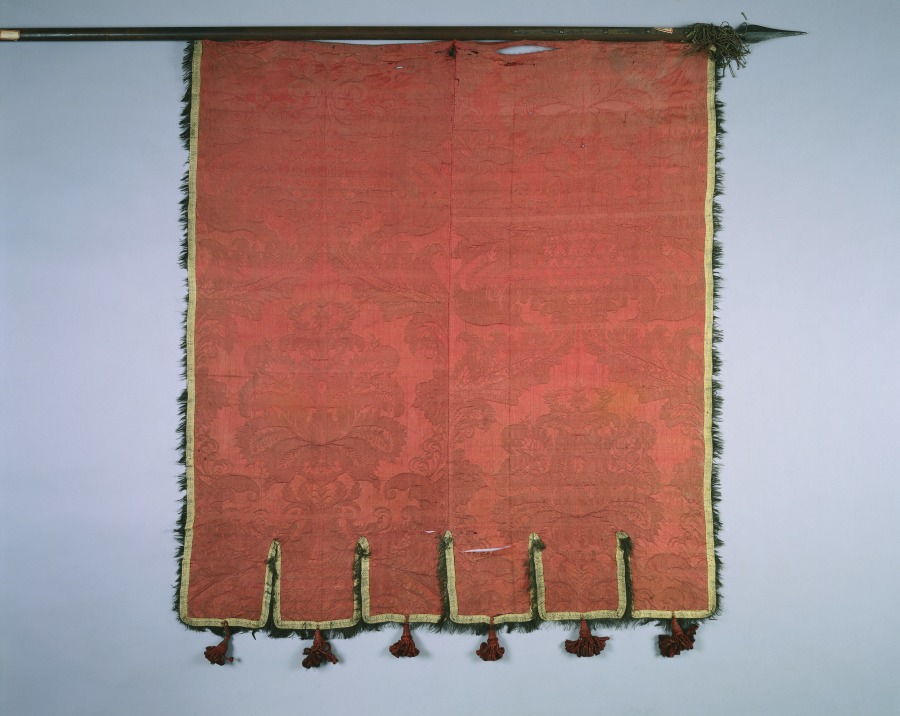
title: Banner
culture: Spain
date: 1700s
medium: crimson silk brocade; scalloped border with fringe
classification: Textile